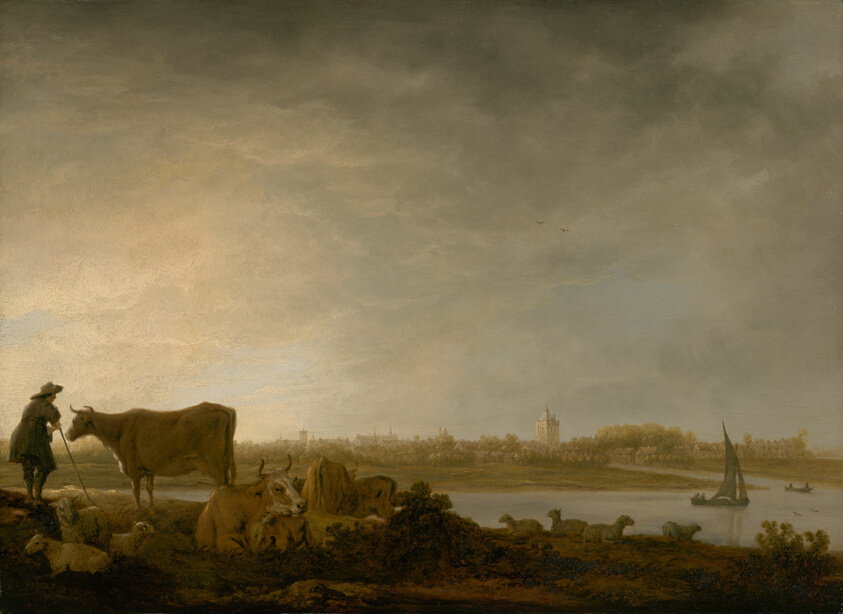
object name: Painting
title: A View of Vianen with a Herdsman and Cattle by a River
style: 17th Century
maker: Aelbert Cuyp (Dutch, 1621–1691)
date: c. 1643–c. 1645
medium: Oil on panel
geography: Dordrecht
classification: painting; european painting; oil on board; paint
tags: landscape, animals, boatman, cows, man, river, sheep, sky, trees, water